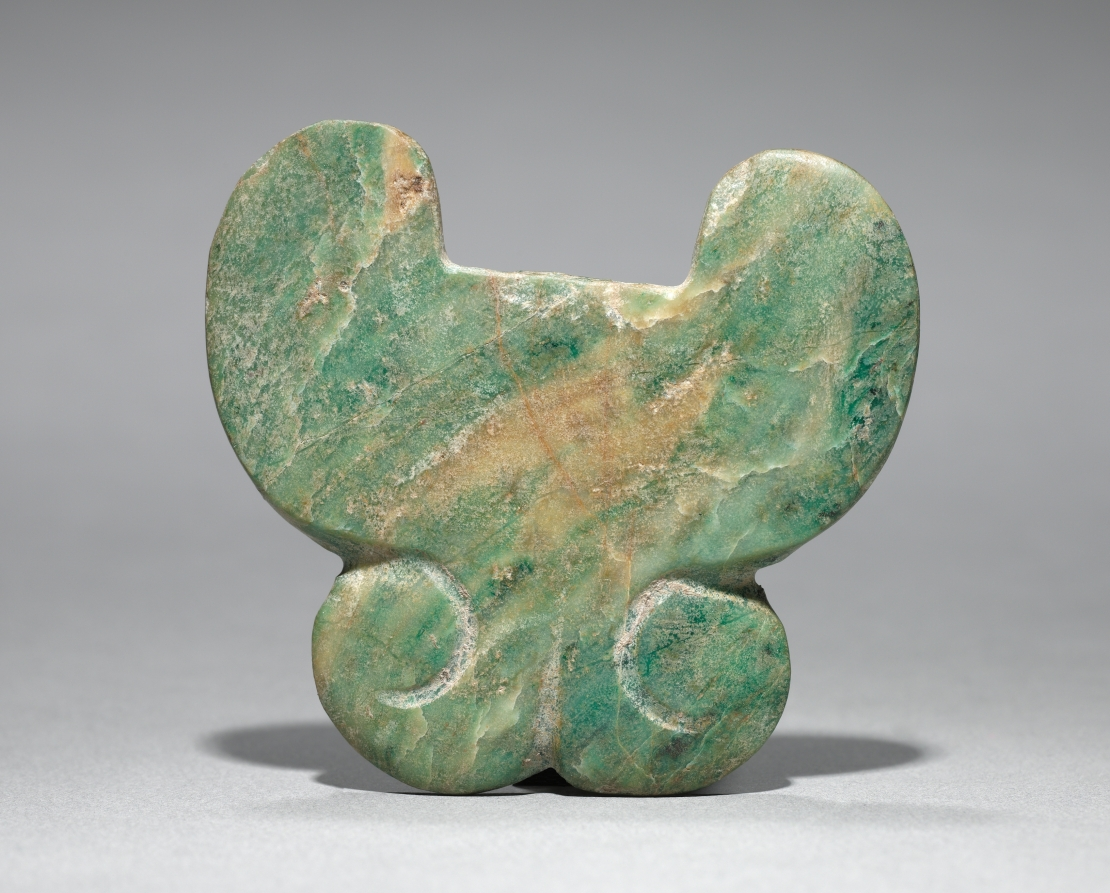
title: Butterfly Nose Ornament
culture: Central Mexico, Teotihuacán, Classic period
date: 150–200 CE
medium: jadeite-albitite?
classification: Stone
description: Near Teotihuacán’s largest palace is a temple ornamented with green-feathered serpents, symbols of the earth’s fertility. Beneath the temple were at least 120 human sacrifices, most men, many warriors, and some wearing greenstone ornaments like these, perhaps a set. The sacrifices may have consecrated the temple or a ruler’s tomb, or both.